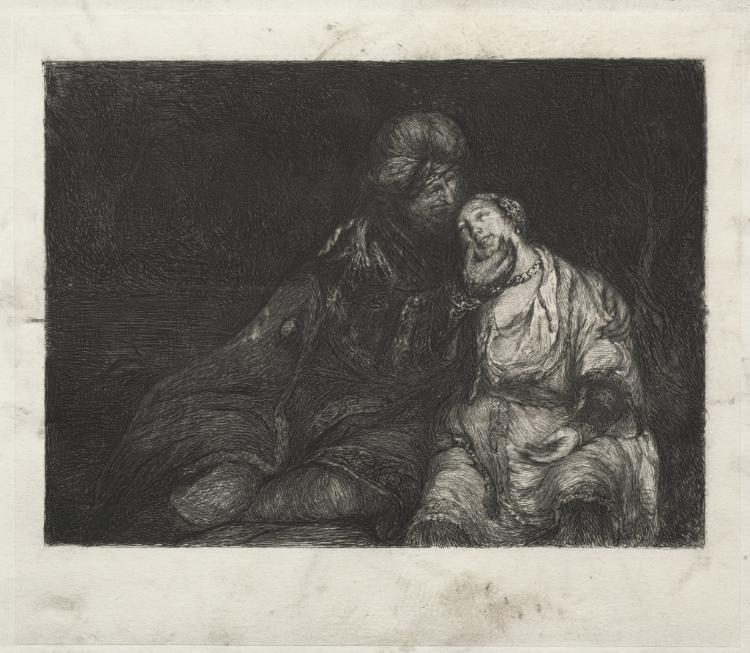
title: Two Figures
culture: Netherlands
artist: after Rembrandt van Rijn (Dutch, 1606–1669)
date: 1800s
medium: etching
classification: Print